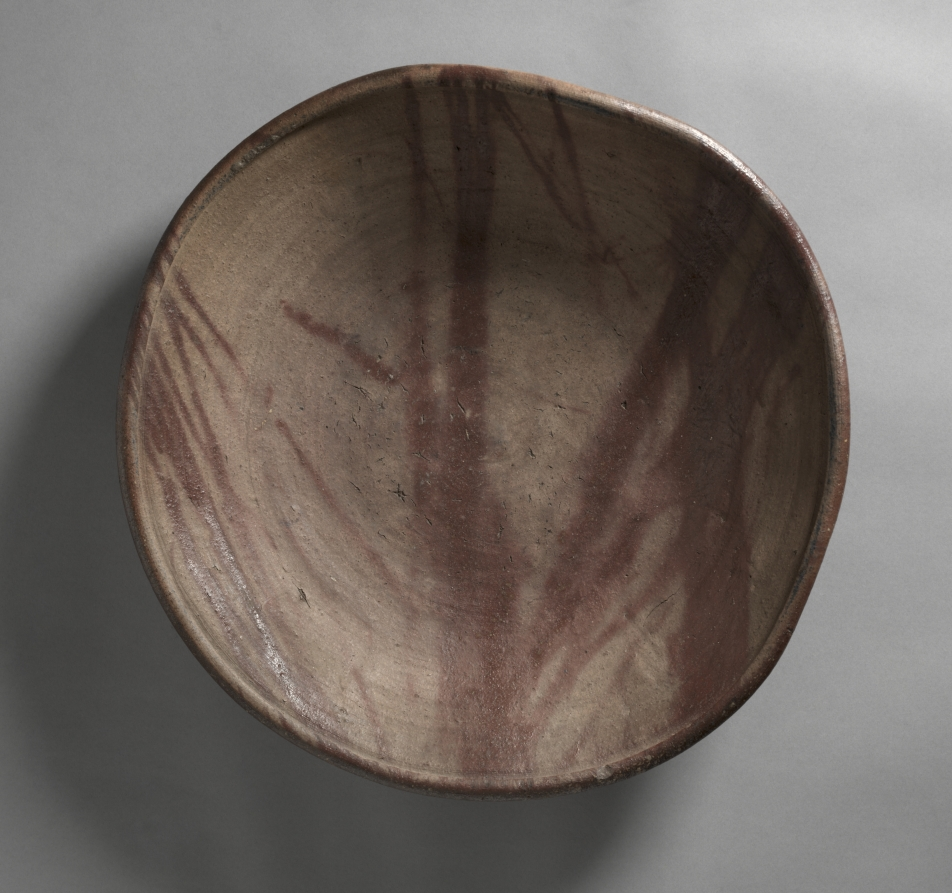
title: Plate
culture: Japan, Momoyama period (1573–1615)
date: late 1500s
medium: stoneware with natural glaze and hidasuki (fire-mark decoration) patterns (Bizen ware)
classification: Ceramic